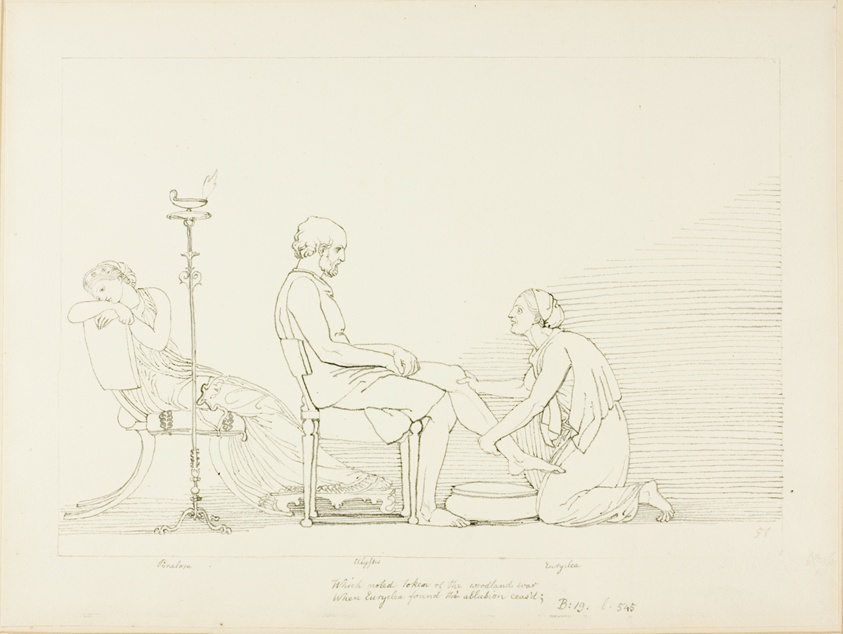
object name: Drawing and Watercolor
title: Ulysses, Penelope and Euryclea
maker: John Flaxman, II; English, 1755-1826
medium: Pen and black ink, over graphite, on ivory wove paper, laid down on tan wove paper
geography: England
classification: pen and ink drawings; drawings (visual works); prints and drawing